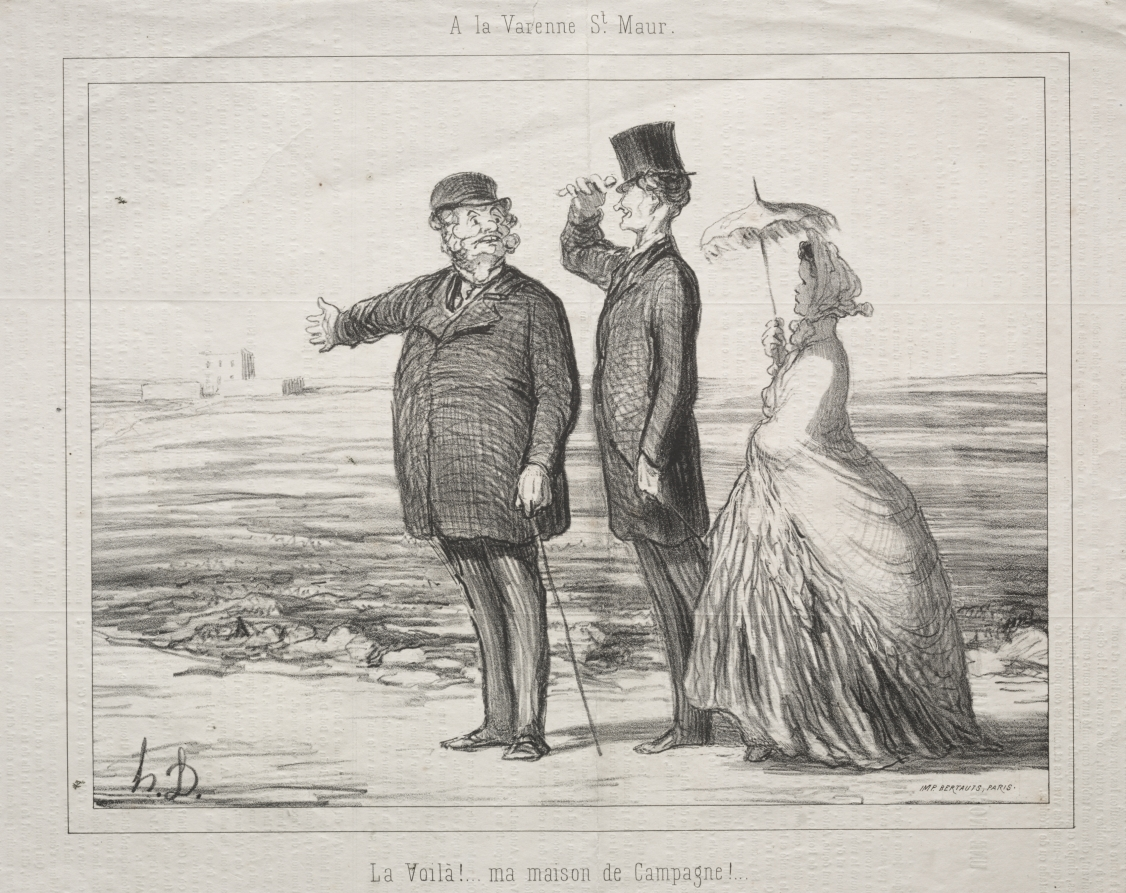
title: At Varenne, Saint-Maur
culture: France, 19th century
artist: Honoré Daumier (French, 1808–1879)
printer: Bertauts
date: 1862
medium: lithograph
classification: Print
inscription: Above image, printed: A la Varenne St.Maur. Below image, printed: La Voilà!... ma maison de Campagne!...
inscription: Lower left corner of the image, printed: IMP. BERTAUTS, PARIS. ; upper margin, in pencil: vol.9 ; lower margin, in pencil: (W-125-1) 28 H.D. 242 i/II / Le Boulevard 11 May 1862 / Pub. in Le Boulevard 11 May 1862 / D. IX. 3247 I/II / 4 / 6 / undescribed?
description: This print was published both in the journal Le Boulevard (May 11, 1862) and in the album Souvenirs d’Artistes (plate 418).